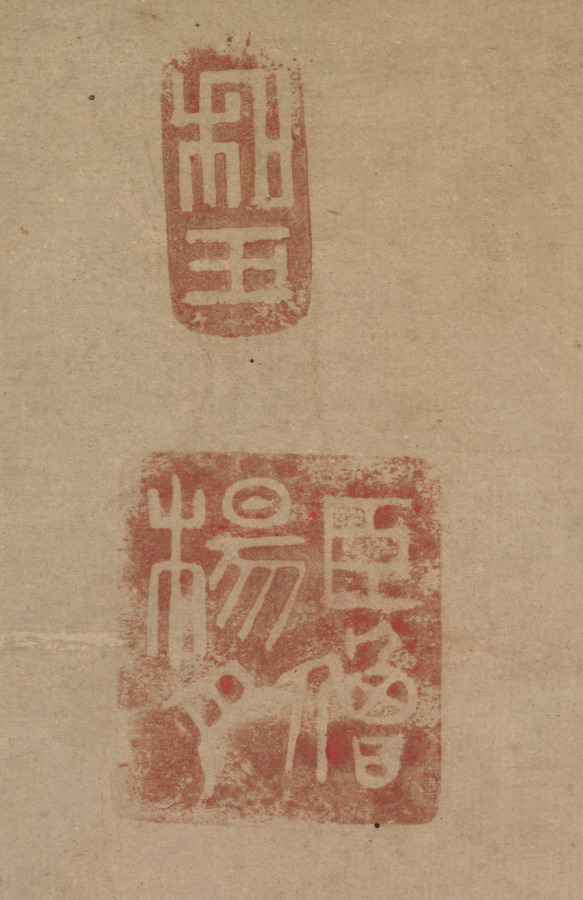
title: Portrait of Sugawara Michizane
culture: Japan, Muromachi period (1392–1573)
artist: Yōgetsu (Japanese, active late 1400s to early 1500s)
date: late 1400s–early 1500s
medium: hanging scroll; ink and color on paper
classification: Painting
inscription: four-line inscription signed "Sakugen Shūryō" (1501-1579) accompanied by two seals unread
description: Sugawara Michizane (845–903) was a Kyoto aristocrat who died in exile in Dazaifu in Japan’s southern island of Kyushu, having been slandered at court. His vengeful spirit was later pacified by the construction of shrines in his name. His image was incorporated into the repertoire of Zen Buddhist figure painting, which included bodhisattvas, Daoist immortals, and other enlightened beings. Eminent monk Sakugen Shūryō (1501–1579) inscribed this work, which was painted by monk-painter Yōgetsu of Kyushu, who traveled east to study either in Kyoto or Kamakura. The Chinese-style poem is an ode to Michizane in his guise as the deity Tenjin.